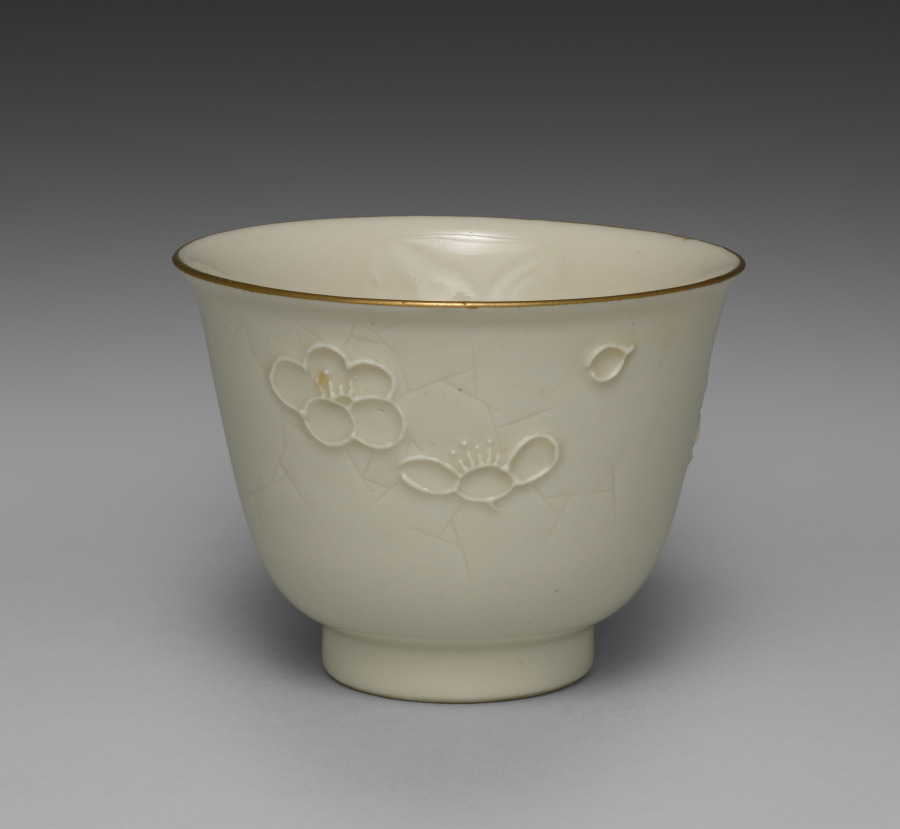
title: Drinking Cup from Dining Set with Plum Blossoms and Cracked-Ice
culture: Japan, Meiji period (1868–1912)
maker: Seifū Yohei II (Japanese, 1844–1878)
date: c. 1875–78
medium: Porcelain with molded designs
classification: Ceramic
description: Each item in this set has a delicate low-relief design of flowering plum branches over scattered, intersecting lines meant to resemble the cracked-ice surface of a frozen body of water and is signed on the base in gold pigment. While Yohei II produced many fine works in underglaze blue, like those produced by Kiyomizu Shichibei, he also made works in quite different styles later in his career, from the early 1870 s. In 1873, he was appointed purveyor to the Industrial Center of Kyoto Prefecture, a designation associated with Kyoto’s efforts to reach an international market through the port of Kobe; and from 1875 until his death, he was involved in national-level projects to present Japanese ceramics across the world. It was during this period that Yohei III was apprenticed to Yohei II, and it has been suggested that this set may in fact be an early example of Yohei III’s work, which he signed with his teacher’s name. Decorated with flowers resembling Japanese textile motifs, the set calls to mind the design of Yohei II’s pair of vases with plum blossoms in the Victoria and Albert Museum. Here, the elaborate trees created for a formal public exhibition setting have been translated into the approachable blossoms of the genteel domestic environment. While the designs are consistent across the pieces, each raised flower petal and pistil and each incised line in the ice was done by hand, so the cups, bowls, and dishes are similar yet unique. The bottoms of two boxes once identified the set’s owner, but the information has been deliberately obscured with black ink. However, inscriptions still visible appear to indicate two occasions, once at the end of July 1886 , and once again in June 1916 , when parts of the set were requested from Hokura in Niigata Prefecture. The location corresponds to a neighborhood in the present-day city of Jōetsu. The surname Tsuji 辻 also appears on a paper tag affixed to one of the box cloths. Future research may possibly reveal more about their provenance. A vase by Yohei III in a private collection combines the formal grandeur of the Yohei II vases in the Victoria and Albert Museum with the gentler design of this dining set, placing flowering plum trees against soft, scalloped-edge clouds resembling those in golden screens.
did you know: The dining wares have a creamy white coloration that the four boxes containing them identify as Korean in style.